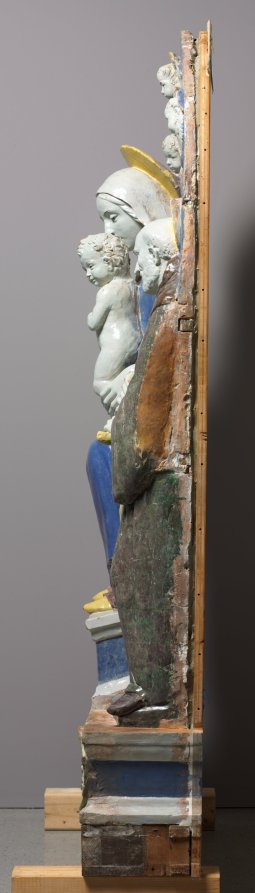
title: Virgin and Child Enthroned with Saints Francis and Giovanni Gualberto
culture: Italy, Florence, 16th century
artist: Benedetto Buglioni (Italian, 1461–1521)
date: c. 1510–20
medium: glazed terracotta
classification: Sculpture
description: The Madonna sits upon a throne with the Christ child standing on her knee. He is steadied by his mother, turning delicately to grasp her robe for support. On the left is Saint Francis, identified by his stigmata. On the right, Saint Giovanni Gualberto is identified by his monk's robe and distinctive processional cross. The brown robes of the saints, the purple of the Virgin's tunic, and the flesh tones of the figures contrast strongly against the bright blue background. In the semicircular sky behind the figures, three winged cherub heads emerge, representing a host of angels. Glazed terracotta is both durable and decorative and the gleaming white of this piece would have stood out in the darkness of a church. The medium was made popular by Renaissance artist Luca della Robbia and came into fashion as a substitute for expensive carved marble. A rounded arch frame embellished with fruit and flower garlands as well as egg-and-dart and cord moldings accompanied the work when it was acquired, but was later determined not to be original and removed. Buglioni's work bears the influence of the della Robbias, particularly in the simple color scheme. Buglioni likely worked in the studio of Luca's nephew, Andrea, where he would have learned the technique of glazing terracotta.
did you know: The unusual purple hue is particular to the artist.